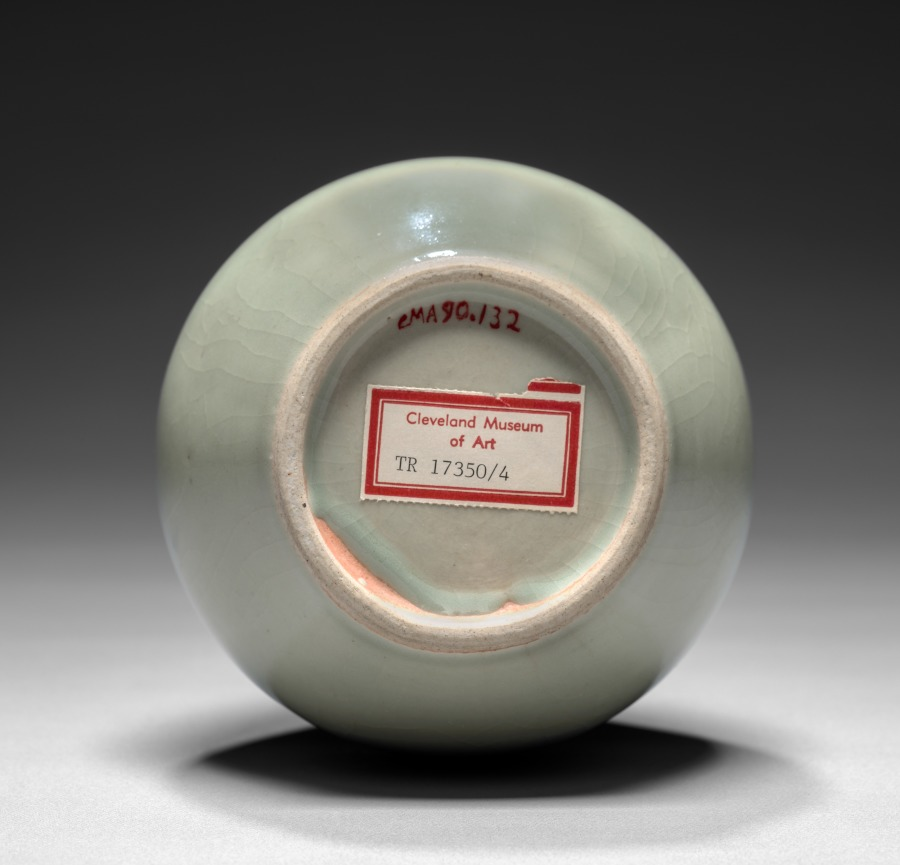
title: Sake Flask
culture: Japan, Edo period (1615–1868)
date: mid- to late 1600s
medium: porcelain with underglaze blue and overglaze celadon decoration (Hizen ware, Arita type, Imari style)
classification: Ceramic